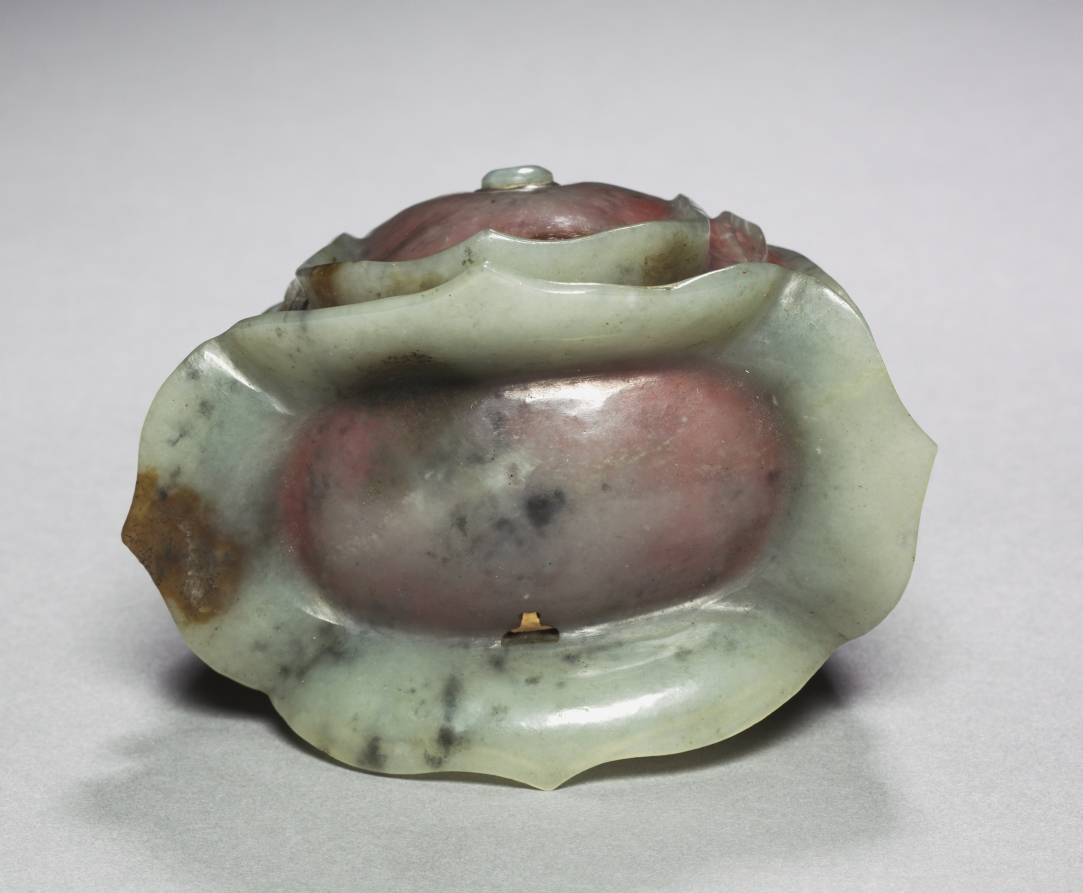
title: Daoist Cap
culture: China, Song dynasty (960-1279) - Yuan dynasty (1271-1368)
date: 960–1279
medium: grayish-green jade with brown and black markings; interior with pink pigment and gold inlays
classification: Jade